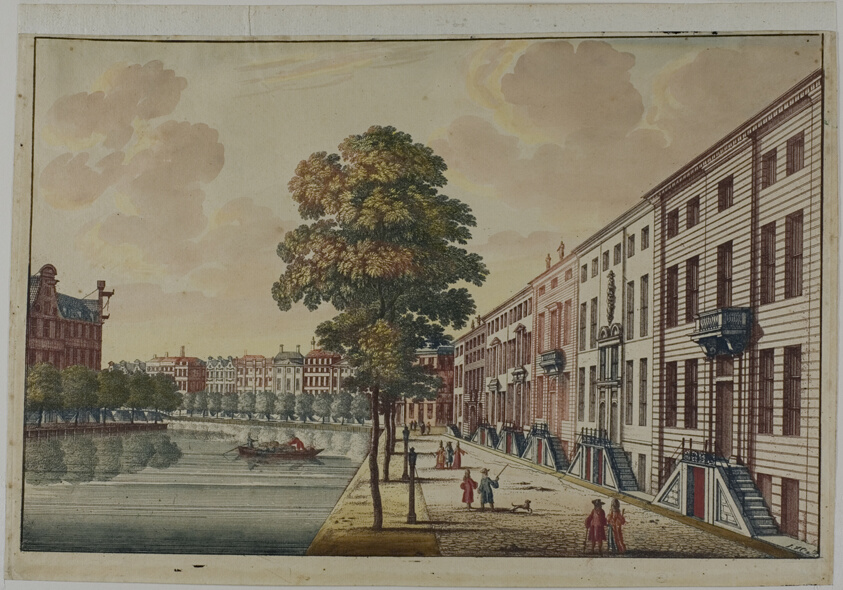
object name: Print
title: View of the Golden Bend on the Herengracht Canal, Amsterdam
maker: Jan van Call I; Dutch, 1655-1703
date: c. 1694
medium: Color etching with opaque and translucent watercolors on cream laid paper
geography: Holland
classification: etching; print; prints and drawing